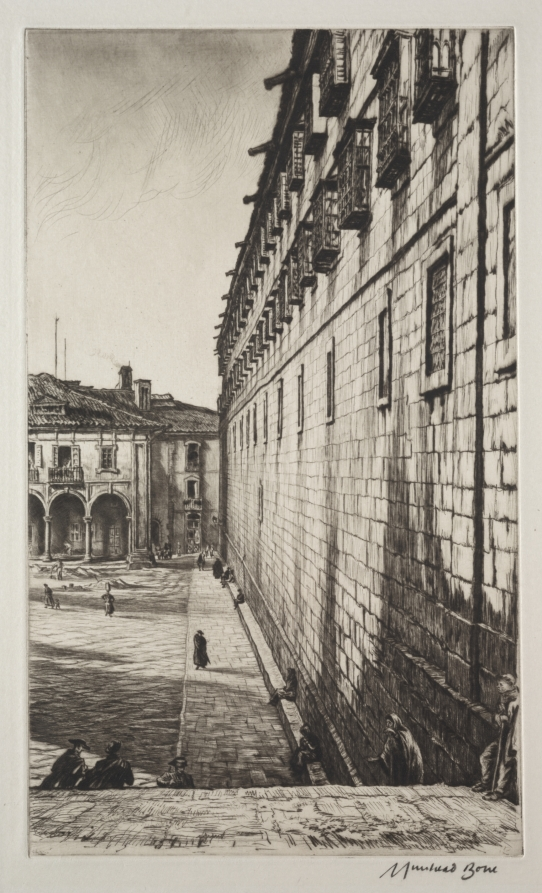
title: Convent of San Payo, Santiago de Compostela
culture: England, 20th century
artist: Muirhead Bone (British, 1876–1953)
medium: drypoint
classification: Print